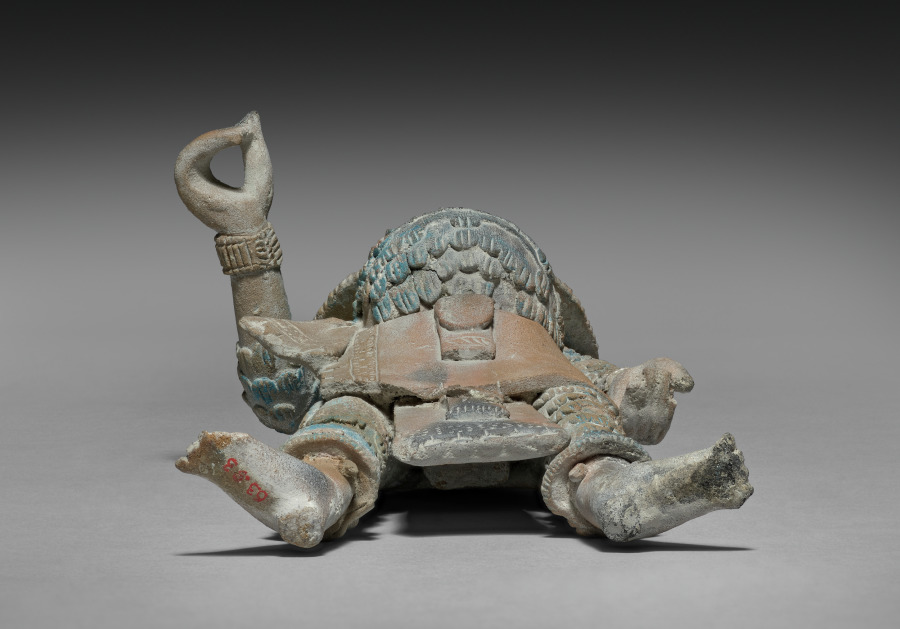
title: Warrior Figurine with Removable Headdress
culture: Mexico, Yucatán, Jaina Island region, Campeche, Maya style (250-900)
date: 600–900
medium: earthenware with pigment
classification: Sculpture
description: The major offerings placed in the Maya graves of Jaina Island were ceramic figurines, some of Mesoamerica's finest, that depict deities and humans in a variety of roles. This warrior, his headdress removable, once probably held weapons and wears either quilted cotton armor or the feathered uniform of a military order. We don't know why such figures are often pot-bellied.